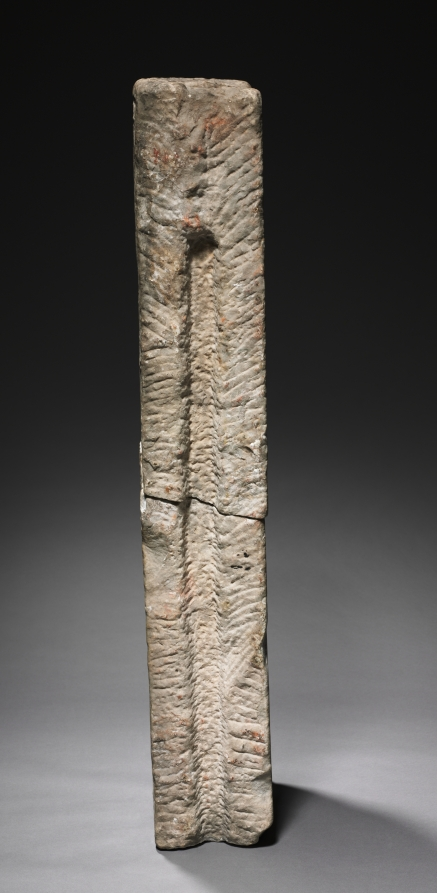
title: Transenna Post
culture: Lombardic, Italy, Rome, Migration period, 8th-9th Centuries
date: 700s-800s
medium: marble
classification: Sculpture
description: In Christian architecture a transenna is an openwork screen of stone or metal enclosing a shrine. These transenna elements were found in Rome; the posts were said to have been excavated on the Coelian Hill and may have originally formed part of the transenna of the Church of San Saba. The Lombards were an ancient Germanic-speaking tribe that settled in Italy after 568. Their artistic tradition was originally centered on small objects of personal adornment like buckles and brooches. After occupying Italy, the Lombards found themselves in contact with large-scale sculpture of classical and early Christian origin that, by the end of the 700s, they had learned to adopt and imitate, as seen here.